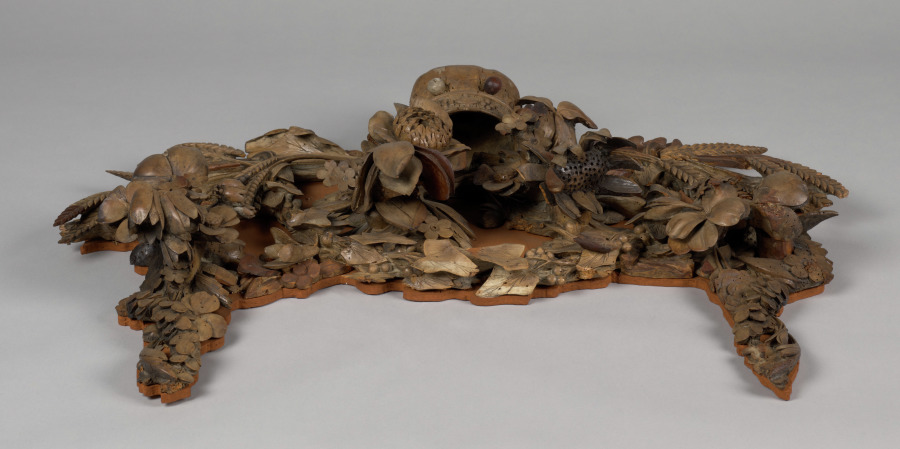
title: Overdoor Decoration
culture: England, 17th century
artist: Grinling Gibbons (British, 1648–1721)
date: c. 1675–1677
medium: limewood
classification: Sculpture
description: This wood carving by Grinling Gibbons, England’s most famous master of this medium, comes from the decoration above a door of the Inner Library at Cassiobury Park, near London, one of the artist’s earliest commissions. Decorative elements from this house were sold after it was pulled down in 1922, but many rooms were photographed before their destruction, and the original location of surviving carvings can thus be identified.